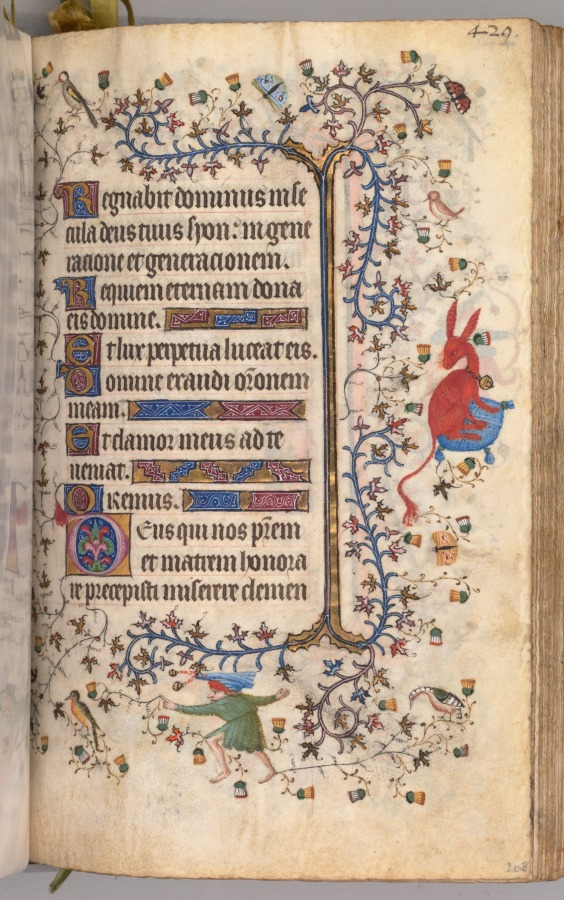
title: Hours of Charles the Noble, King of Navarre (1361-1425): fol. 209r, Text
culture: France, Paris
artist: Master of the Brussels Initials and Associates (French)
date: c. 1405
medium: ink, tempera, and gold on vellum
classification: Bound Volume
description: This precious volume was obviously highly prized by its owner, the French-born King of Navarre, who had his coat of arms painted on no less than twenty folios. Rather than directly commissioning this manuscript from a specific workshop, it seems that Charles the Noble acquired his book of hours -- perhaps ready-made for the luxury market -- while on a trip to Paris in 1404-05. A collaborative effort, six painting styles are evidenced within the pages of this codex, those of two Italians, two Frenchmen, and two Netherlanders. The painter who was responsible for the planning and decoration of the book, and who produced seventeen of the large miniatures, was a Bolognese artist known as the Master of the Brussels Initials. His principal assistant, responsible for most of the borders, was a Florentine who signed his name "Zecho" da Firenze on folio 208 verso.